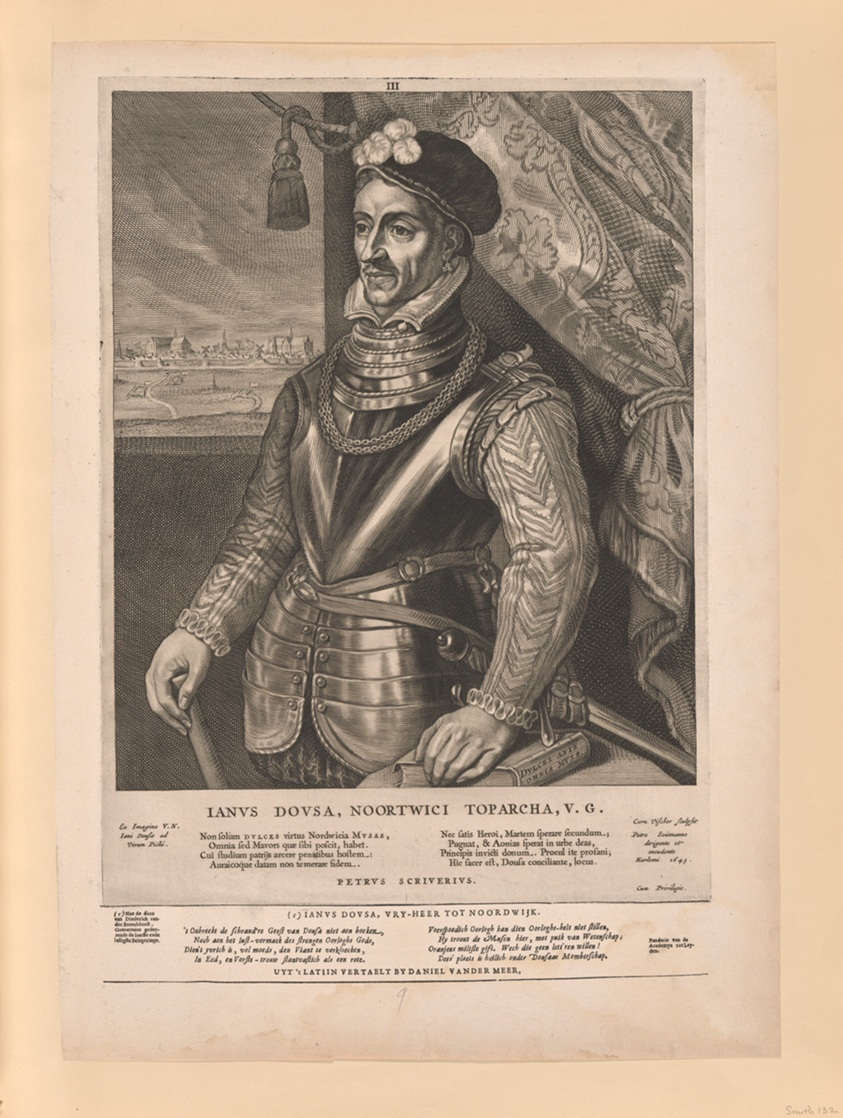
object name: Print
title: Jan van der Does, from Quatuor Personae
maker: Cornelis Visscher (Dutch, c. 1629-1658); published by Pieter Claesz. Soutman (Dutch, c. 1580–1657)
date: 1649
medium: Engraving and letterpress on paper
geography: Netherlands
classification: engraving; paper; print; prints and drawing